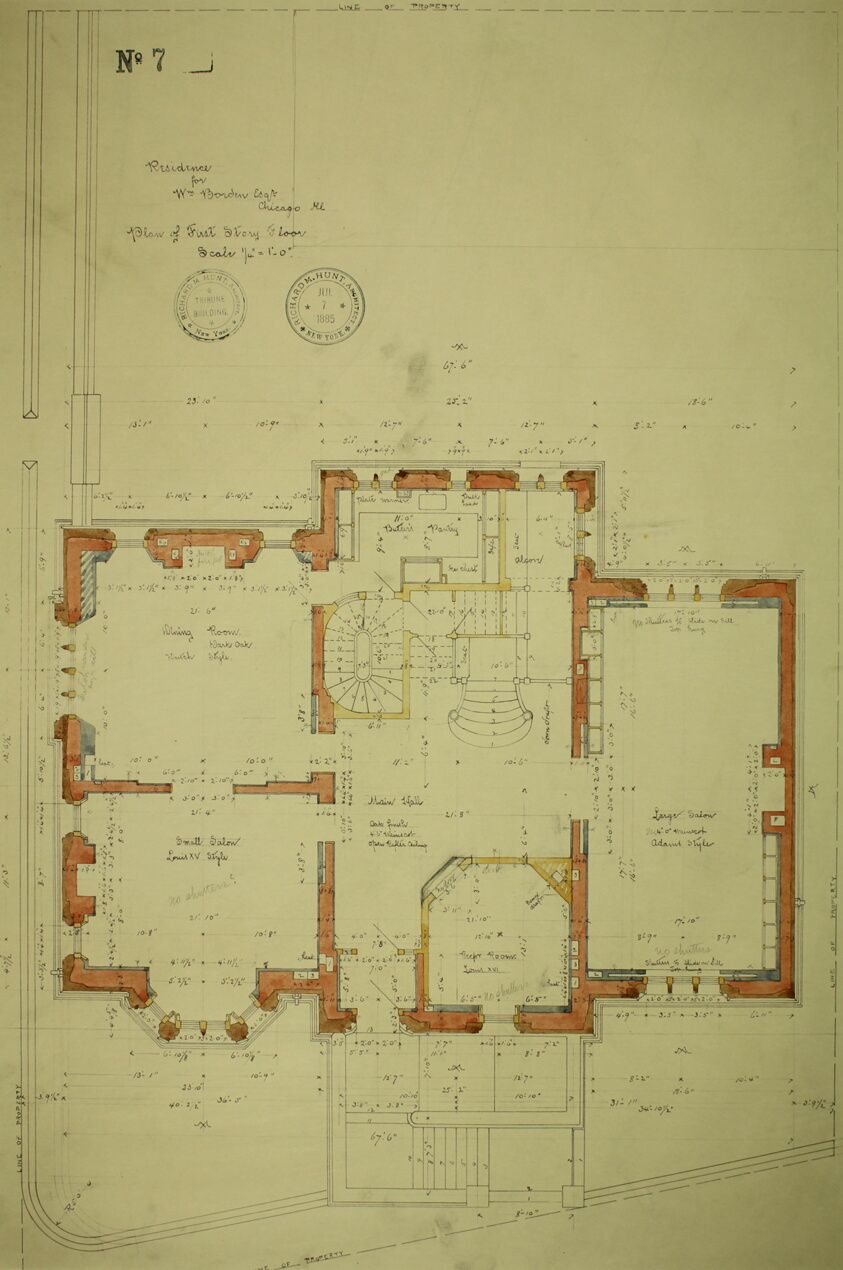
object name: Architectural Drawing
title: William Borden Residence, Chicago, Illinois, First Floor Plan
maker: Richard Morris Hunt (American, 1827-1895)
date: 1886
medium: Watercolor on hectographic print, mounted on linen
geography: Chicago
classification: working drawing; architectural drawing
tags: Chicago